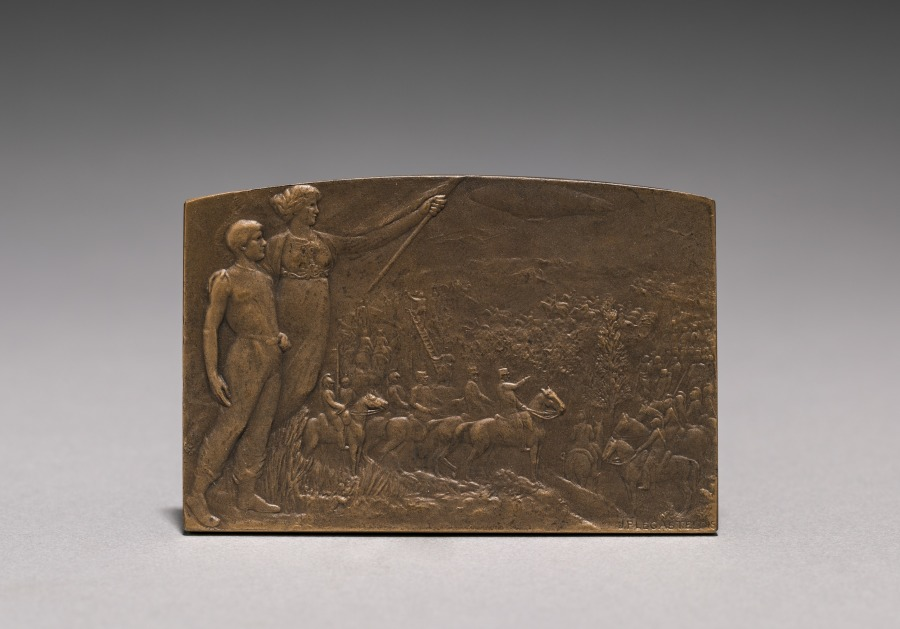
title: Medal (obverse)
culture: France, 19th century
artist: Jules Prosper Legastelois (French, 1855–1931)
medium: bronze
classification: Metalwork